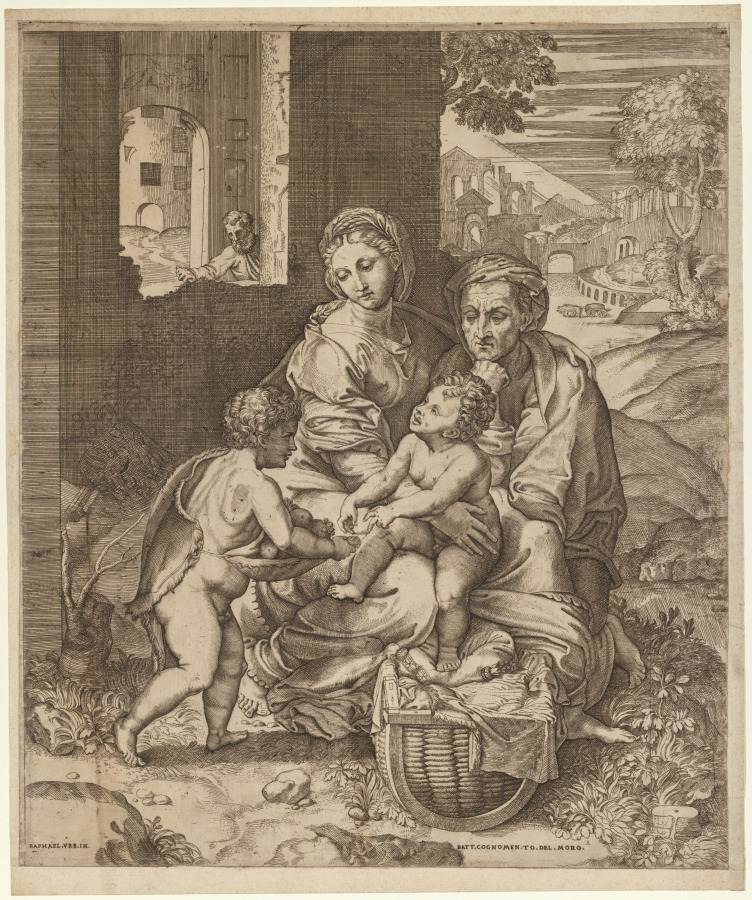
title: The Holy Family (La Perla) (after Raphael)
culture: Italy, 16th century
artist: Battista Angolo del Moro (Italian, 1514–1575)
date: 1550–1570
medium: Etching with engraving on paper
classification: Print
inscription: Imprinted in lower right on recto: “RAPHAEL.VRB.IN”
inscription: Imprinted in lower left on recto: “BATT.COGNOMEN TO DEL.MORO.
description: Battista Agnolo del Moro made this etching to reproduce the most famous painting by Renaissance artist Raphael in his hometown of Verona. Raphael’s composition depicts the Christ Child with members of his family: Joseph, Mary, Mary’s cousin Elizabeth, and Elizabeth’s son John the Baptist. Battista’s graphic style emphasizes the glowing light around the grouping and their tender glances and touch.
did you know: This etching portrays the extended family of the Christ Child including his cousin, Saint John the Baptist.